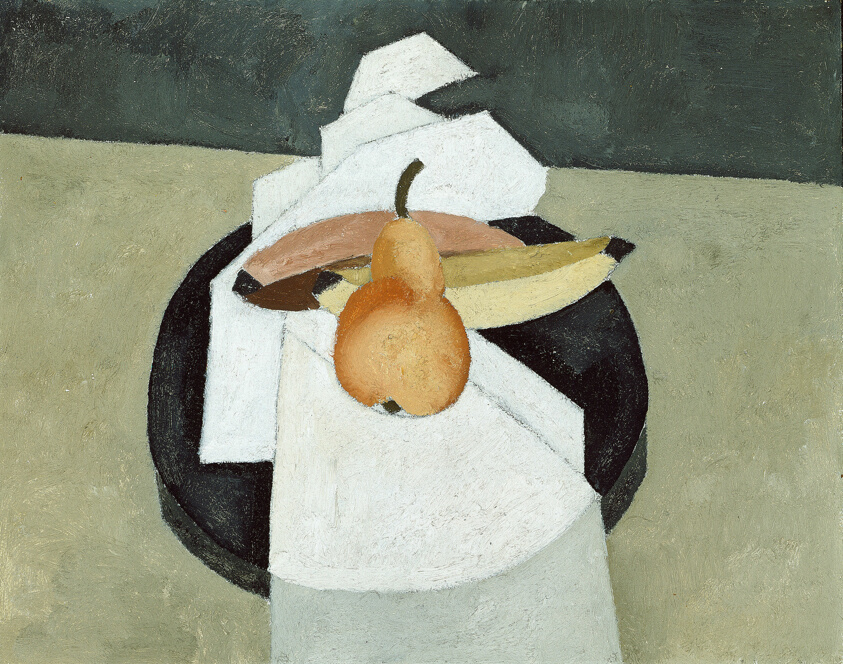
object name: Painting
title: Movement No. 10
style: Modernism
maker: Marsden Hartley (American, 1877–1943)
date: 1917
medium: Oil on composition board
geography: United States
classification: painting; modern and contemporary art